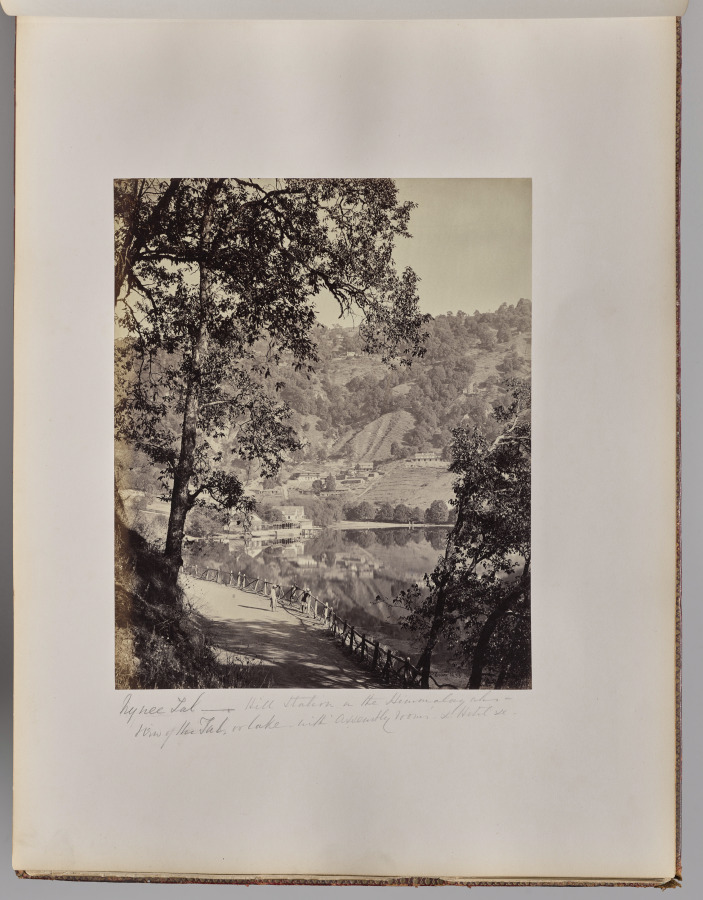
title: Hyree Lake. Hill Station in the Himmalayahs. View of the Taj Lake with Assembly Rooms, Lhutse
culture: England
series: Photographs of Northern India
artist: Samuel Bourne (British, 1834–1912)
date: 1863–70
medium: albumen print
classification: Photograph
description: The 50 images in this album, all taken in the 1860s, move from the hill towns of the Himalayas down to cities including Lahore (now in Pakistan), Delhi, Lucknow, Agra, Benares (now Varansi), and Calcutta (now Kolkata). Architectural studies of major monuments offer valuable historical records of what sites such as the Taj Mahal and the imperial mosque of the Mughal emperors in Delhi looked like before twentieth-century restorations.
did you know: Samuel Bourne, the author of most the images in this album, was a banker in England before he moved to India to become a professional photographer.